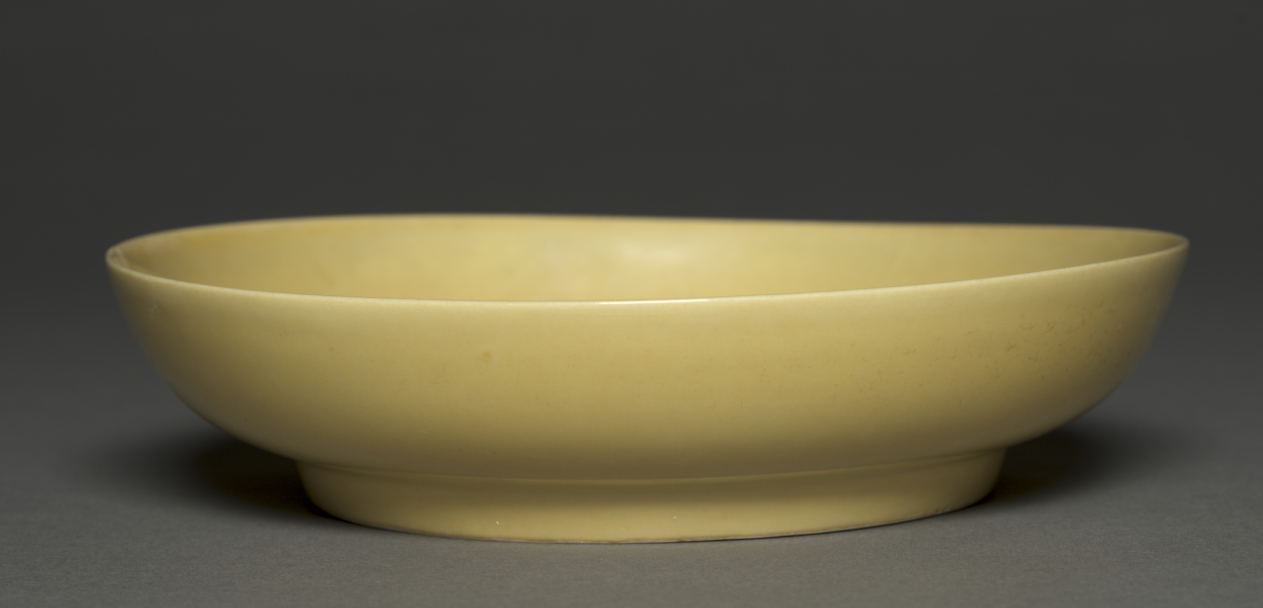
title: Dish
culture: China, Jiangxi province, Jingdezhen, Ming dynasty (1368-1644), Chenghua mark and period (1465-1487)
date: 1465–87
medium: porcelain with yellow glaze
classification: Ceramic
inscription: 大明成化年製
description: Former director Sherman Lee stressed the significance of technical innovation in his study of Chinese ceramics. He believed that "in the great Chinese [ceramic] tradition one can say that its major theme is the development and refinement of monochrome stoneware and porcelain . . . [E]ven in the Ming and Qing dynasties, equal attention was given to monochrome reds and yellows." This masterpiece of Ming monochrome ware was part of the Millikins' generous bequest, one that significantly augmented the museum's already strong holdings of Chinese ceramics. Lee pointed out that with this bequest the museum's collection is "reasonably complete and, even better, represented by works of high quality."